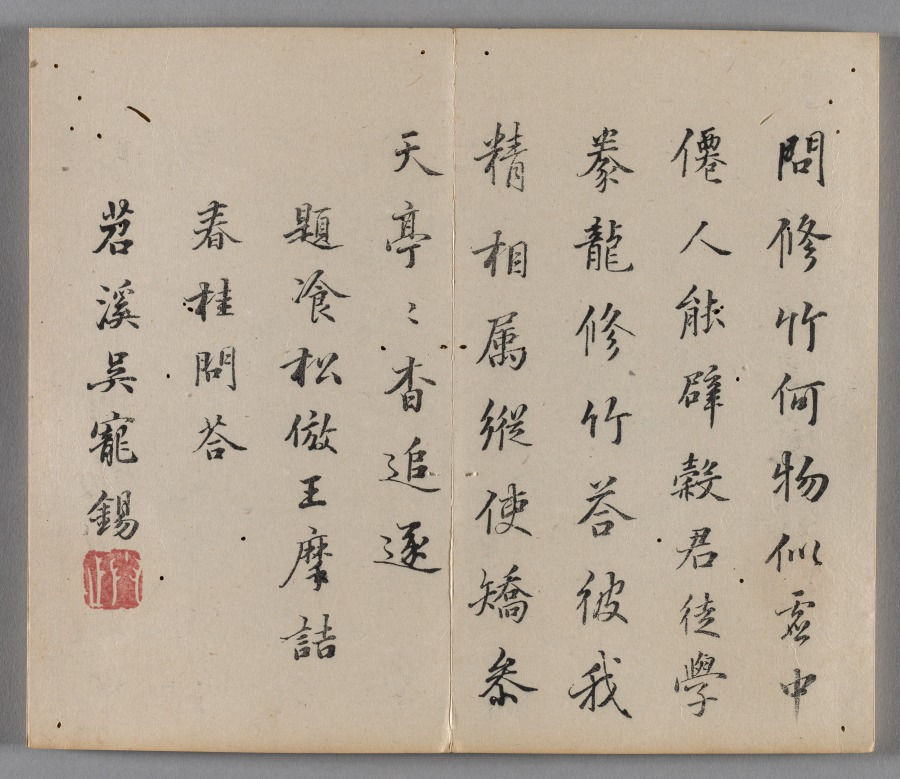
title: Ten Bamboo Studio Painting and Calligraphy Handbook (Shizhuzhai shuhua pu): Bamboo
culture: China, Qing dynasty (1644-1911)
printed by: Hu Zhengyan (Chinese, c. 1584–1674)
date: 1633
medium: Woodblock-printed book; ink and colors on paper; first edition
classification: Print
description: Color printing reached a level of perfection in the early 1600s, as seen in this Ten Bamboo Studio Collection of Calligraphy and Painting and the Mustard Seed Garden Manual of Painting (printed 1679 and 1701). The painterly quality, precision in registering (aligning) the woodblocks, and harmonious colors made them the most successful color print editions in Chinese history. Both editions were printed and compiled in Nanjing, spread nationwide, and had a great impact on the arts in Japan and Korea.